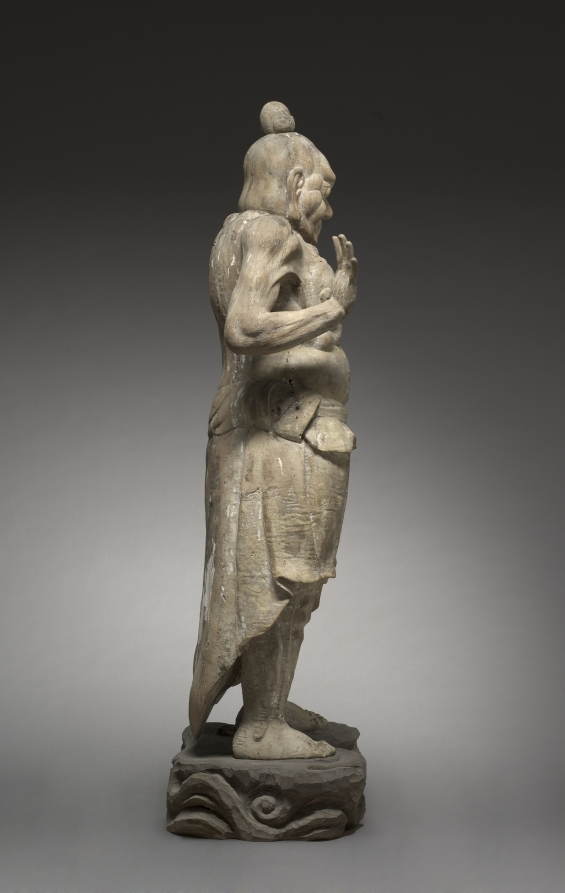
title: Guardian Figure: Nio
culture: Japan, Kamakura period (1185–1333)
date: 1200s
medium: chestnut and cypress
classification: Sculpture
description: A pair of guardians usually stands at the entrance of Japanese Buddhist temples. Traditionally, the pair included a closed-mouth figure, one hand displayed as if indicating his potential power, and an open-mouth figure, expelling his full force against evil spirits. Nio figures were usually displayed outdoors, often with just the roof of the entrance gate as protection, and as such were particularly susceptible to weathering.